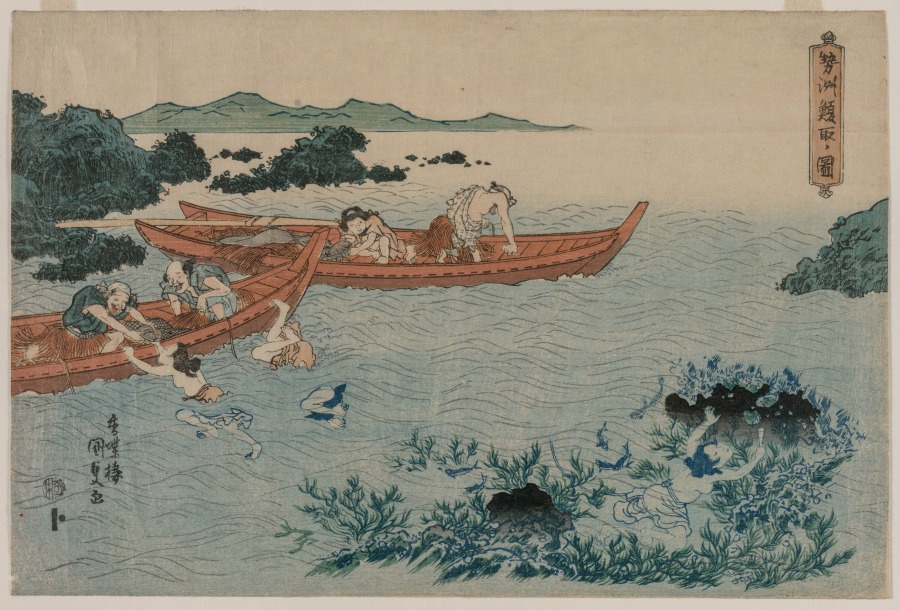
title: Abalone Divers off the Coast of Ise, from an Untitled Landscape Series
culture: Japan, Edo period (1615–1868)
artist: Utagawa Kunisada (Japanese, 1786–1865)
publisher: Yamaguchiya Tobei (Japanese)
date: early 1830s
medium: color woodblock print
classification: Print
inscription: 香蝶楼国貞画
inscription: Publisher: Yamaguchiya Tobe (emblem). Censorship Seal: kiwame 極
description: Prolific printmaker Utagawa Kunisada produced this seascape of abalone fishing as part of a series of untitled landscape prints in the early Tenpō era (1830–44). In the coastal city of Ise on Japan’s main island of Honshu, female divers called ama traditionally did the physically demanding job of harvesting shellfish such as abalone. These marine snails are valuable for their edible flesh, and their iridescent inner shell is a source of mother-of-pearl. This print depicts three stages of the harvest: One diver plunges into the water, another holds her breath while prying an abalone off the rocks with a blade, and a third ama conveys her successful harvest to the beaming fishermen on the boat.